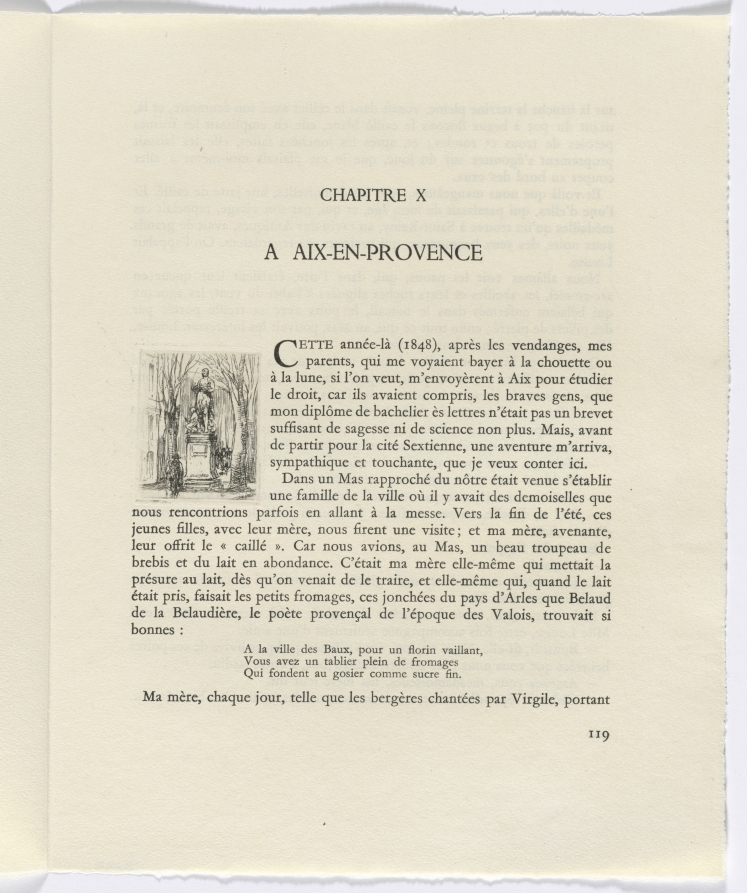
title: Frédéric Mistral: Mémoires et Recits by Frédéric Mistral: monument (page 119)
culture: France, 20th century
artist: Auguste Brouet (French, 1872–1941)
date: 1937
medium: etchings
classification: Portfolio